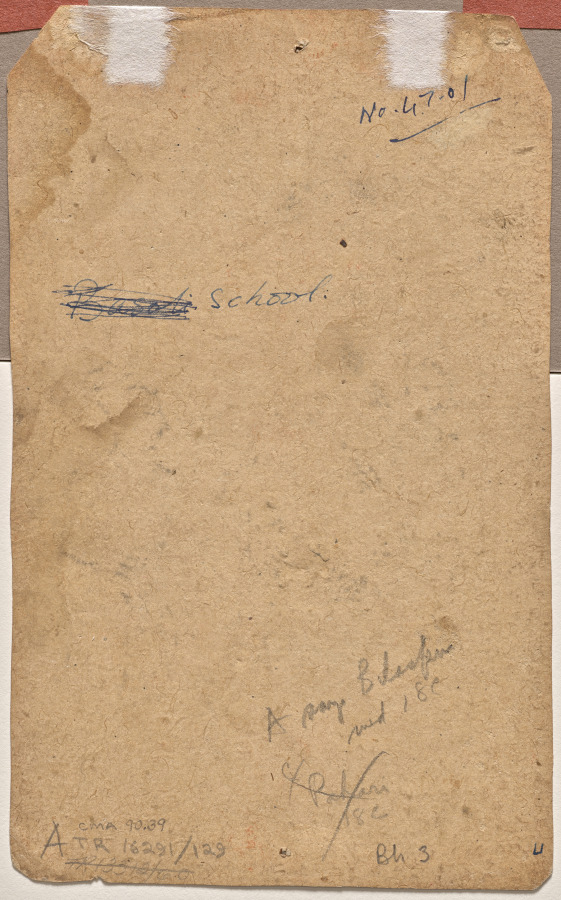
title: Patamanjari Ragini of Dipak, from a Ragamala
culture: Northern India, Pahari kingdoms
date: c. 1740–50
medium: Gum tempera and ink on paper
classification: Painting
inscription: rāgaṇī paṭamaṃjarī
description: The sound that serves as the basis for this musical mode is the voice of the cat. Paintings of Patamanjari Ragini are set on the outdoor terrace of a fine house, complete with niches holding vessels. The heroine sits in front of a bolster on a green floral carpet that the artist has tilted up so as not to obscure its pattern. The spotted gray cat appears shy, and the heroine is trying to entice it with a morsel, while she gestures for it to come.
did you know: A young girl and her companion play with a cat to pass the time.